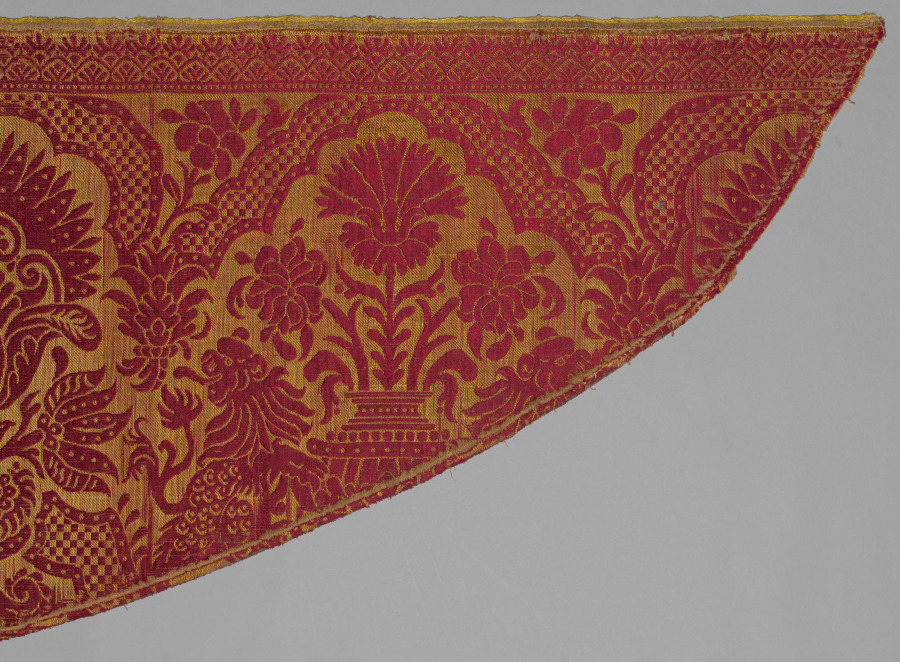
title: Silk and Hemp Fragment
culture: Spain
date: 1500s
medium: plain compound satin: silk and hemp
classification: Textile